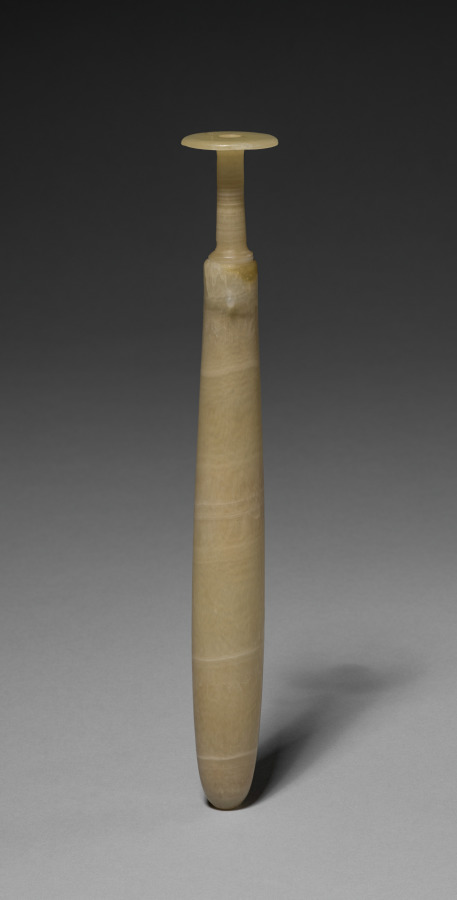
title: Alabastron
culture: Egypt, Greco-Roman period (332 BCE–395 CE), Ptolemaic dynasty (305–30 BCE)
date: 305–222 BCE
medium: travertine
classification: Vessels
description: Both ancient Egyptian men and women loved cosmetics. Unguents, oils, and perfumes made from aromatic plant resins and gums were obtained at great cost from distant lands. The objects identified with cosmetics were given lavish treatment.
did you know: This perfume holder might have been attached to a string, making it easily portable.